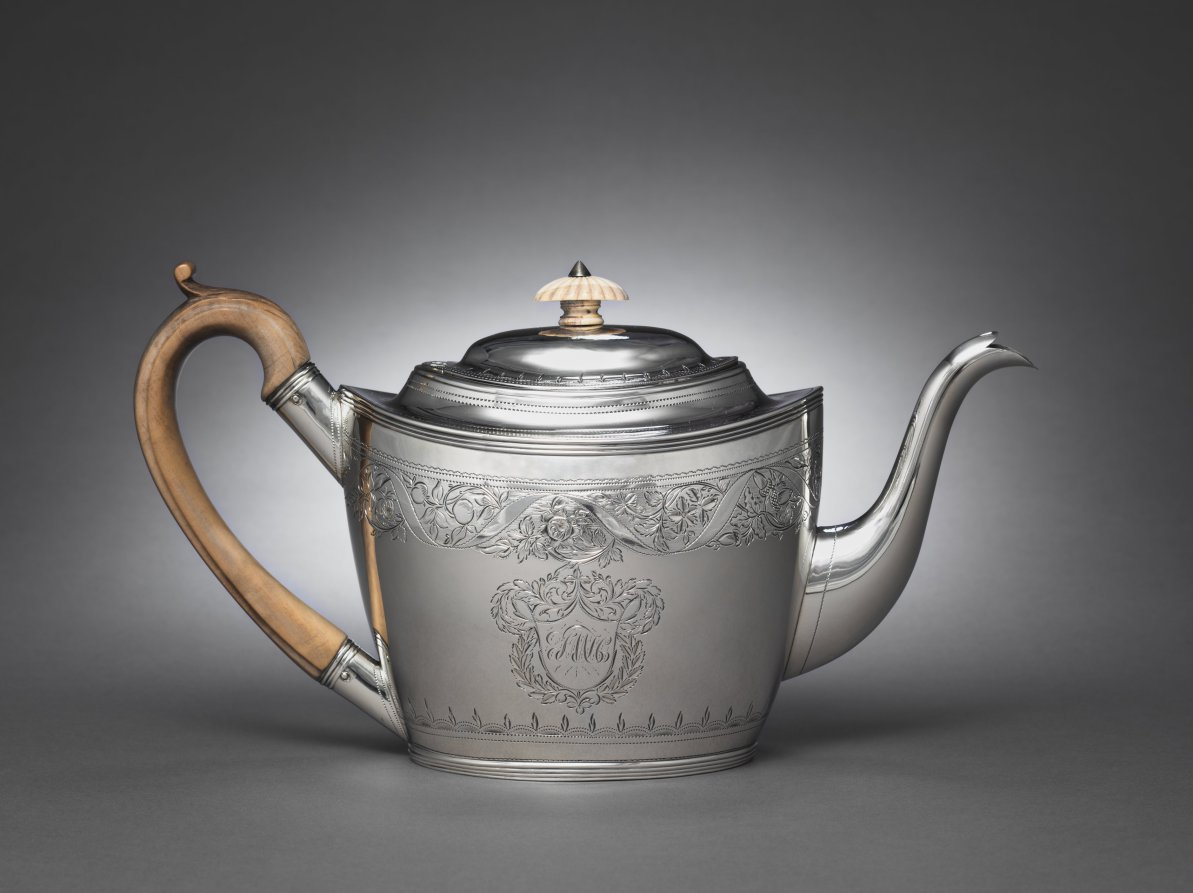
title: Tea Service (Teapot)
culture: London, England, 19th century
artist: Anne Bateman (British, 1748–1813)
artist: Peter Bateman (British, 1740–1825)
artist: William (I) Bateman (British, 1774–1850)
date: 1801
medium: silver, ivory, wood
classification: Silver